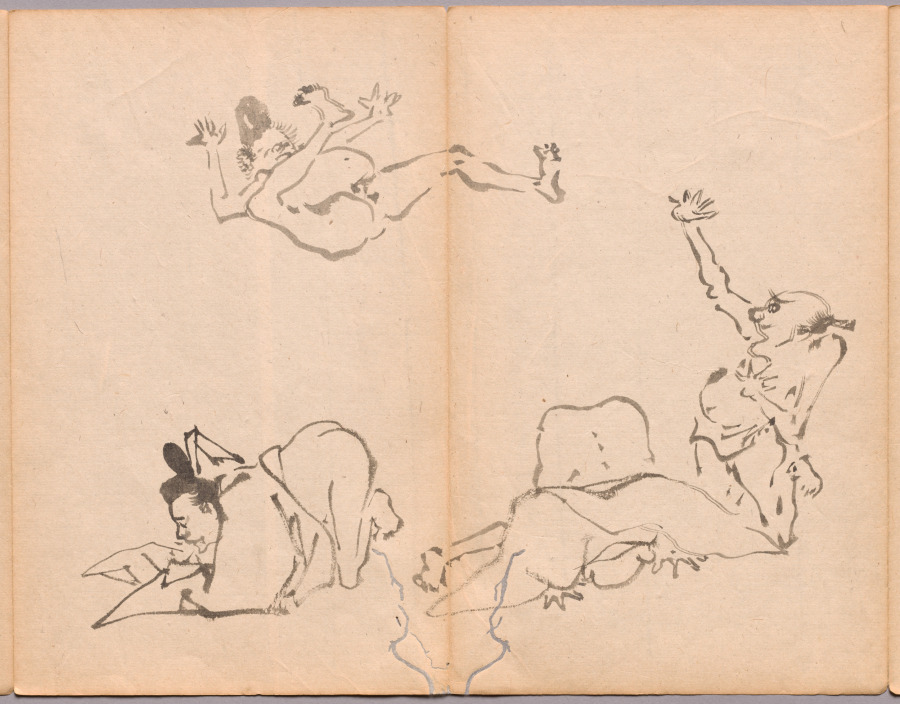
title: Courtiers' Farting Contest from Sketch Album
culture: Japan, Edo period (1615–1868) to Meiji period (1868–1912)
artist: Kawanabe Kyōsai (Japanese, 1831–1889)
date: mid- to late 1800s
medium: Accordion-style book of 26 double-leaves; ink and color on paper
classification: Bound Volume